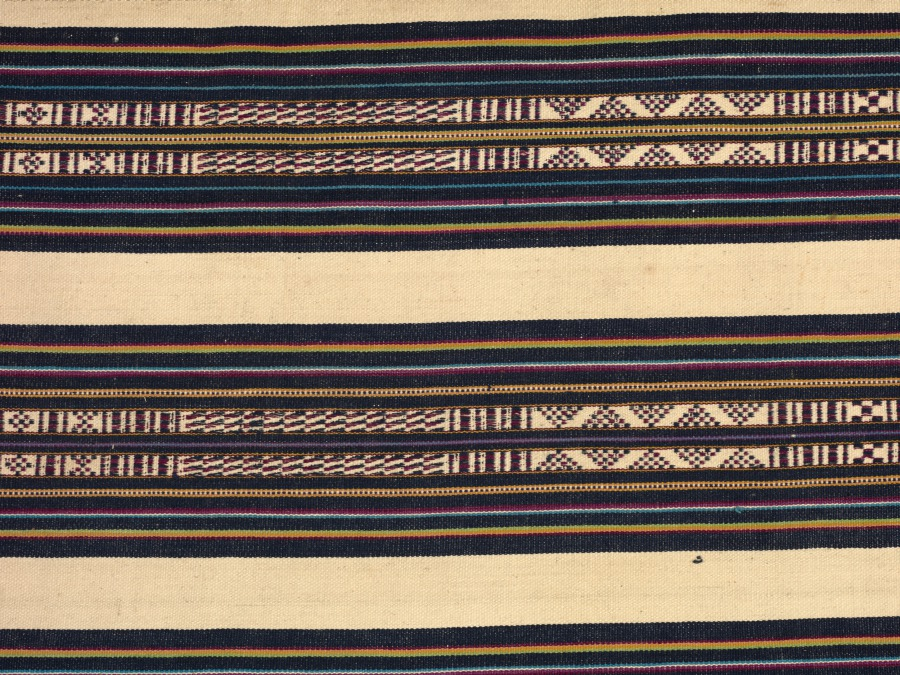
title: Textile Hanging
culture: Tibet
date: 1900–1915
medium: wool and cotton: warp faced plain weave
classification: Textile